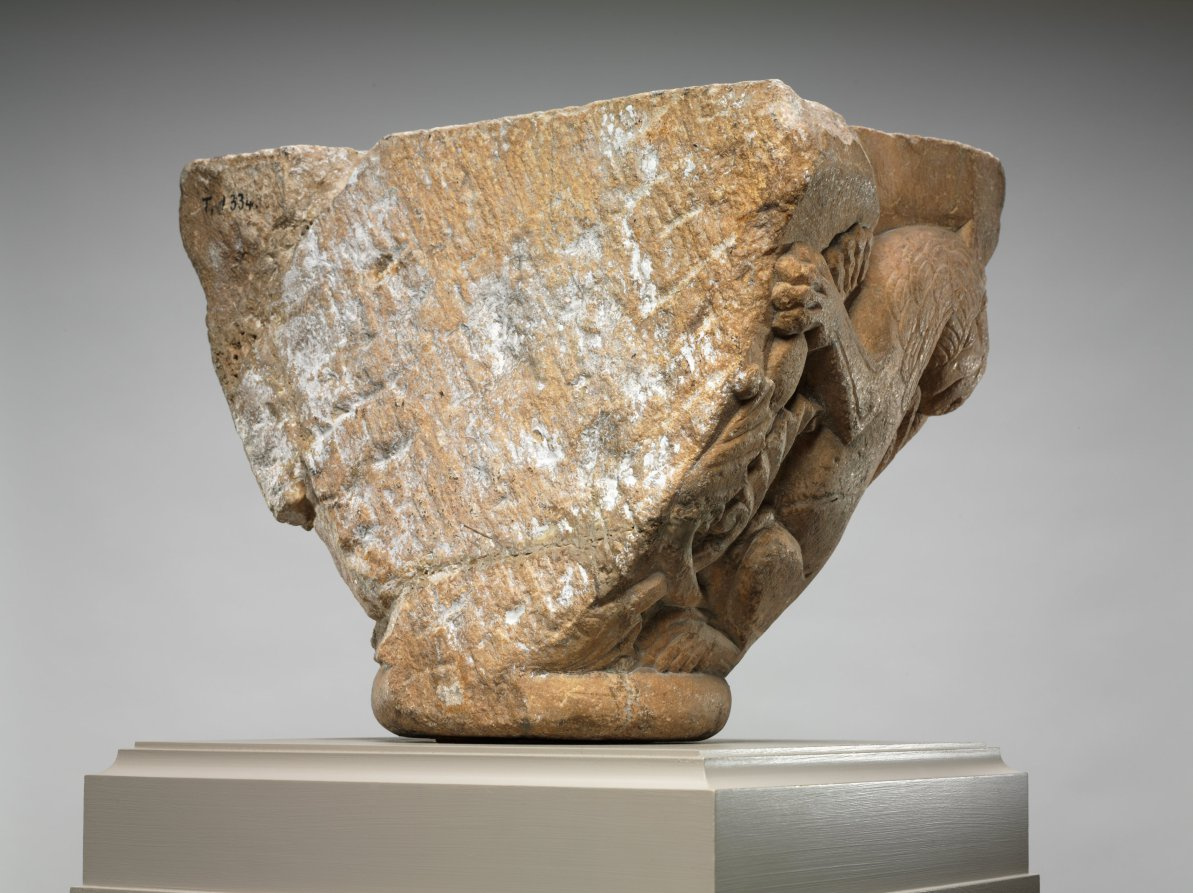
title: Engaged Capital with Lions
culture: Northern Spain (Navarre ?) or Southwest France (Pyrénées or Roussillon ?), mid-12th century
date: 1145–64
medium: marble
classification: Sculpture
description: The compositional motif of confronted and addorsed beasts illustrated on this capital was especially popular in churches along the pilgrimage roads.